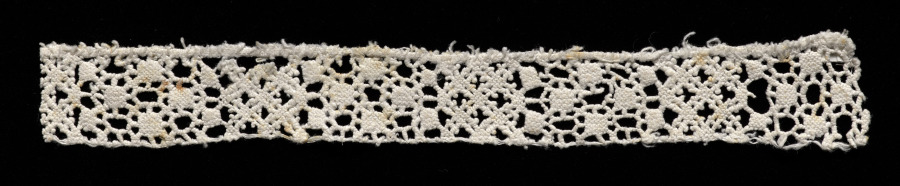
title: Lace Fragment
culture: Italy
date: 1600s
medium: Needle lace (punto avorio or ivory stitch) insertion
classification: Lace